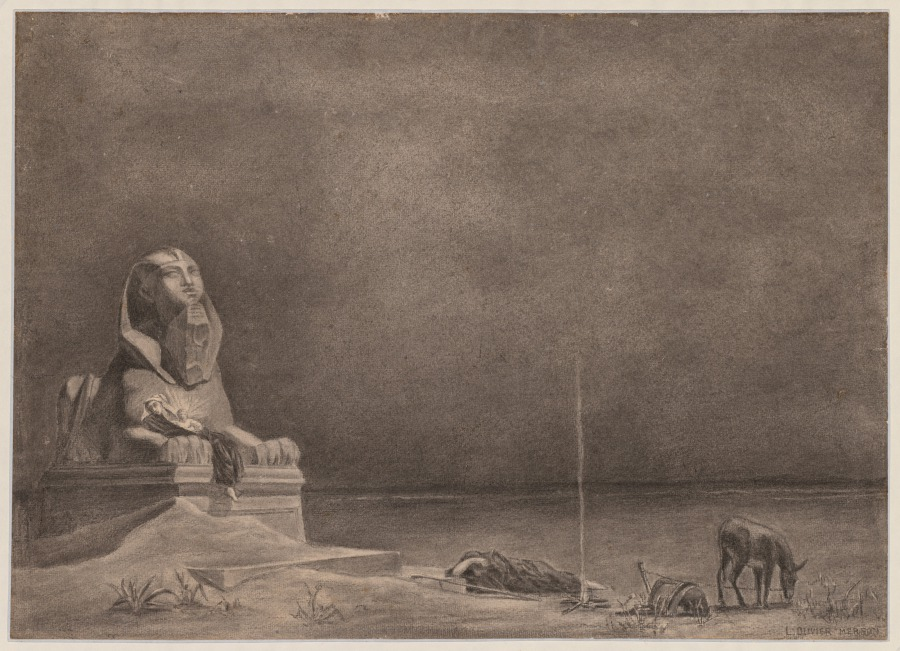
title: Rest on the Flight to Egypt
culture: France, 19th- 20th century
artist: Luc-Olivier Merson (French, 1846–1920)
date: c. 1879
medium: charcoal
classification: Drawing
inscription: lower right: L. Olivier Merson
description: This charcoal sketch relates to an oil painting that was tremendously popular at the 1879 Paris Salon. In both works, Luc-Olivier Merson depicted the Holy Family finding refuge in a massive sphinx sculpture during the rest on the flight into Egypt. The drawing may have been an independent work or, more likely, a study for the painting or a related print.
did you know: Despite the detail of his depictions on the subject, Luc-Olivier Merson never traveled to North Africa.